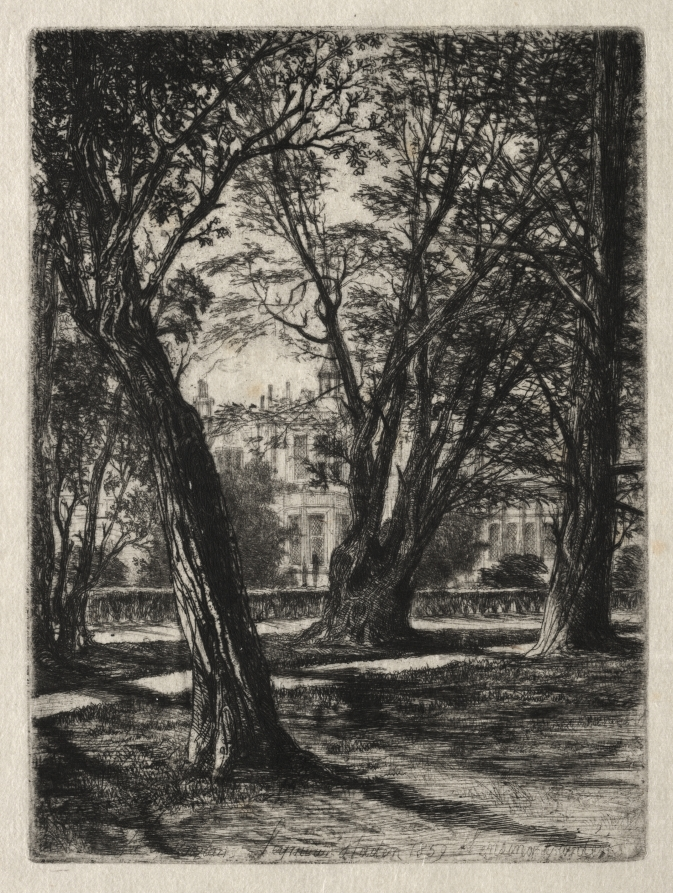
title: Kensington Gardens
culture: England, 19th century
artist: Francis Seymour Haden (British, 1818–1910)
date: 1859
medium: etching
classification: Print